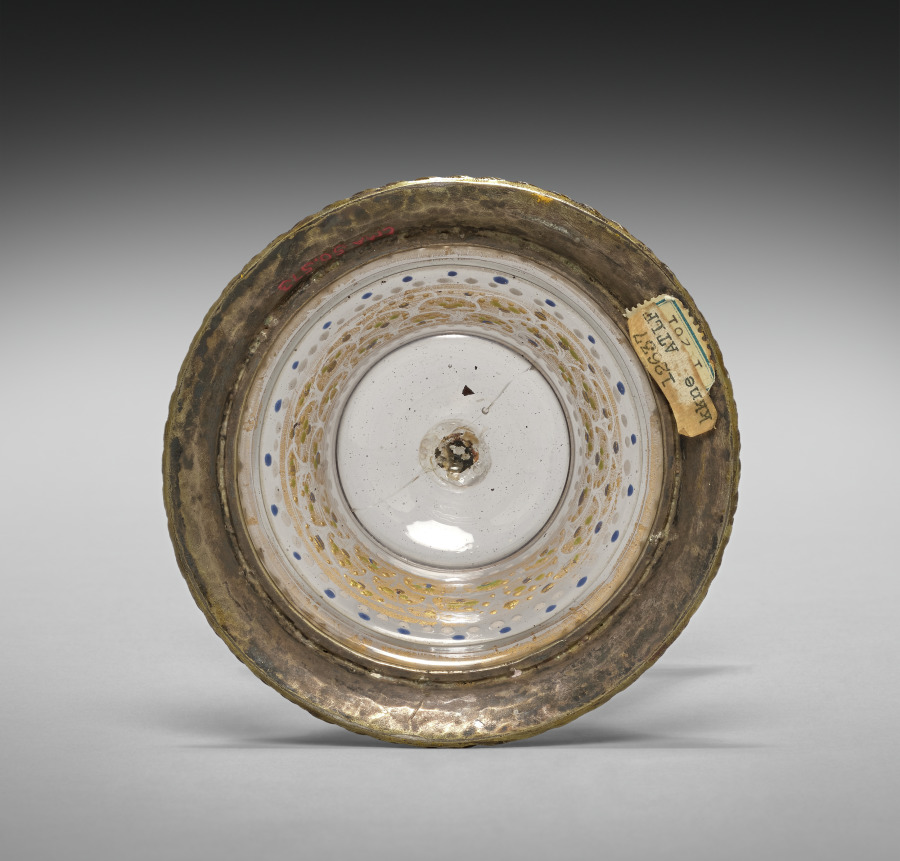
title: Beaker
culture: Italy, Venice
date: c. 1490–1500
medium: glass, enameled and gilded, gilt-silver mounts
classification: Glass